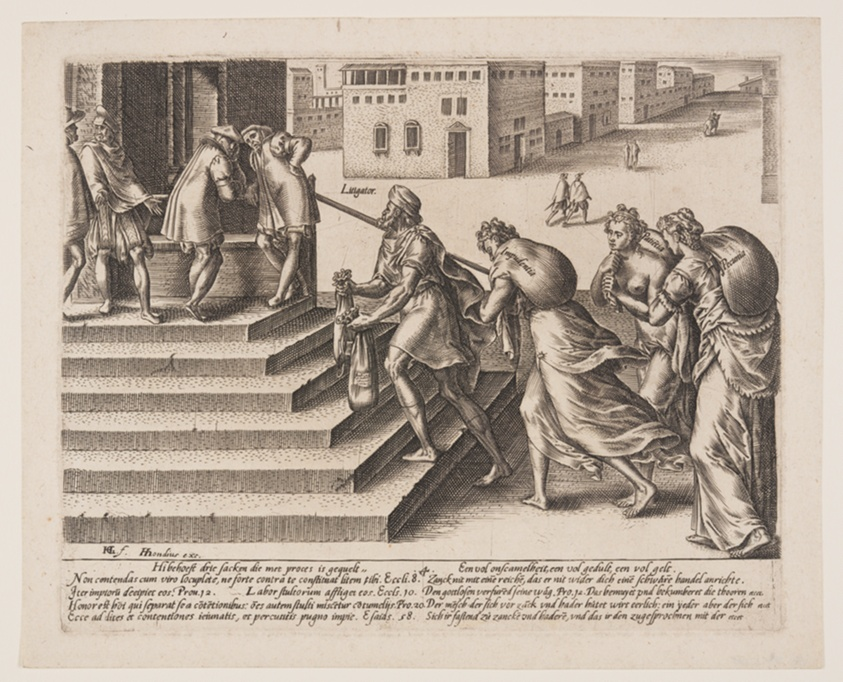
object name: Print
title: Unequal Justice, plate 4 from The Abuses of The Law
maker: Hendrick Goltzius (Dutch, 1558–1617)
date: c. 1580, published 1597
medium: Engraving on laid paper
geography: Netherlands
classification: engraving; paper; print; prints and drawing